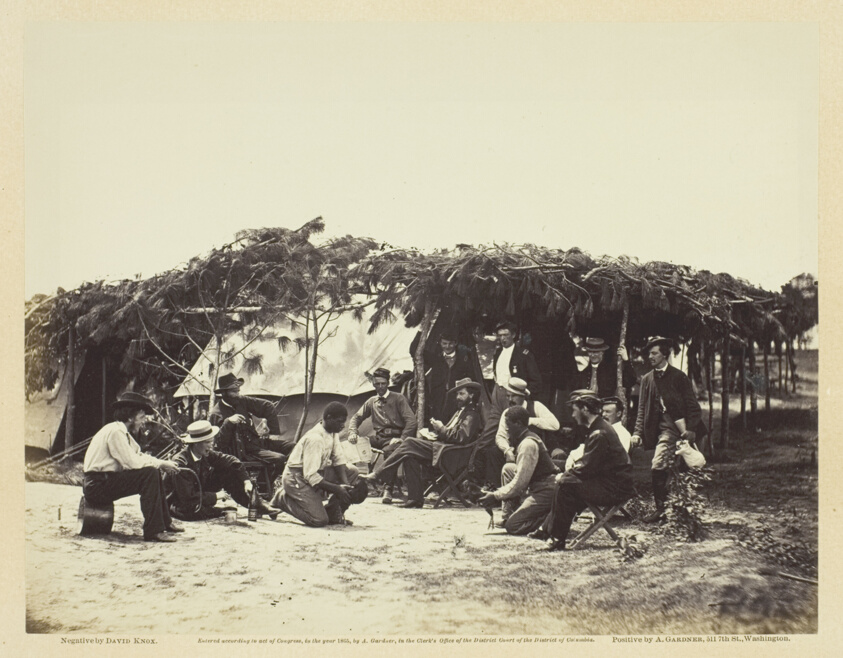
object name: Photograph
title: A Fancy Group, in Front of Petersburg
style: 19th century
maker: David Knox (American, active 19th century)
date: August 1864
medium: Albumen print, pl. 76 from the album "Gardner's Photographic Sketch Book of the War, Volume II" (1866)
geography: United States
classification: photograph; albumen silver print; photography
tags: Collected by Hugh Edwards, Gardner's Photographic Sketch Book